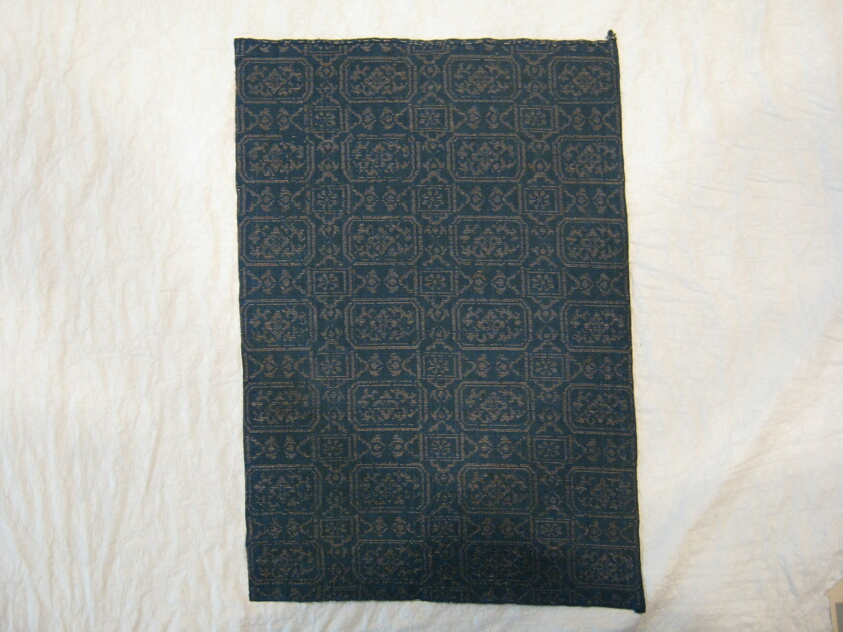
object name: Textile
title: Fragment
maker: Possibly China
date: 18th century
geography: China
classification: textile; weaving